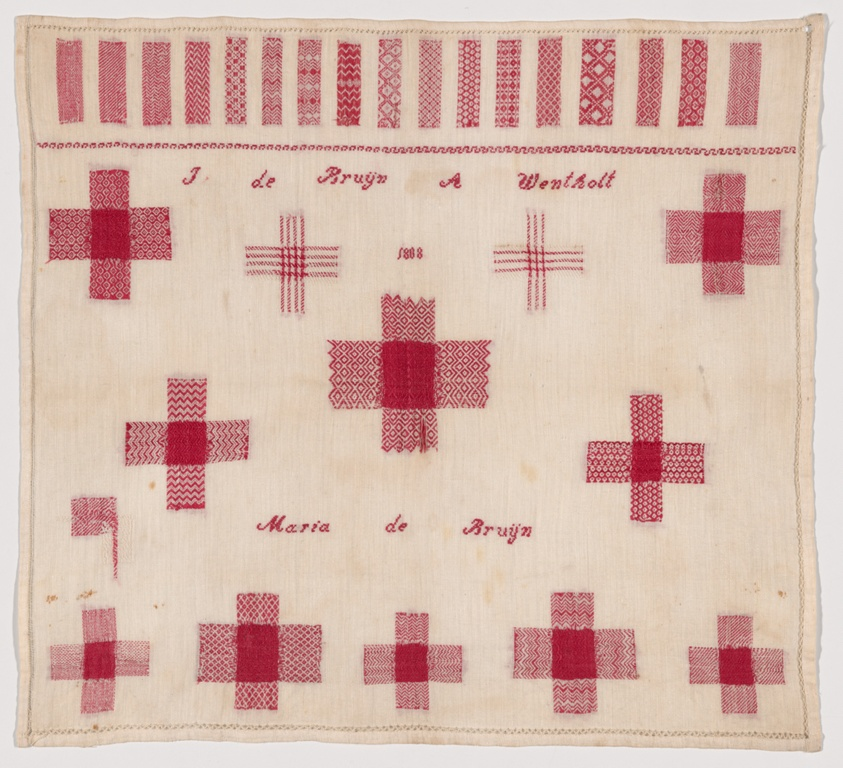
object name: Textile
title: Darning Sampler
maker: Netherlands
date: 1808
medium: Cotton, plain weave; embroidered in darning and cross stitches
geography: Netherlands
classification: textile; needlework (visual works); sampler